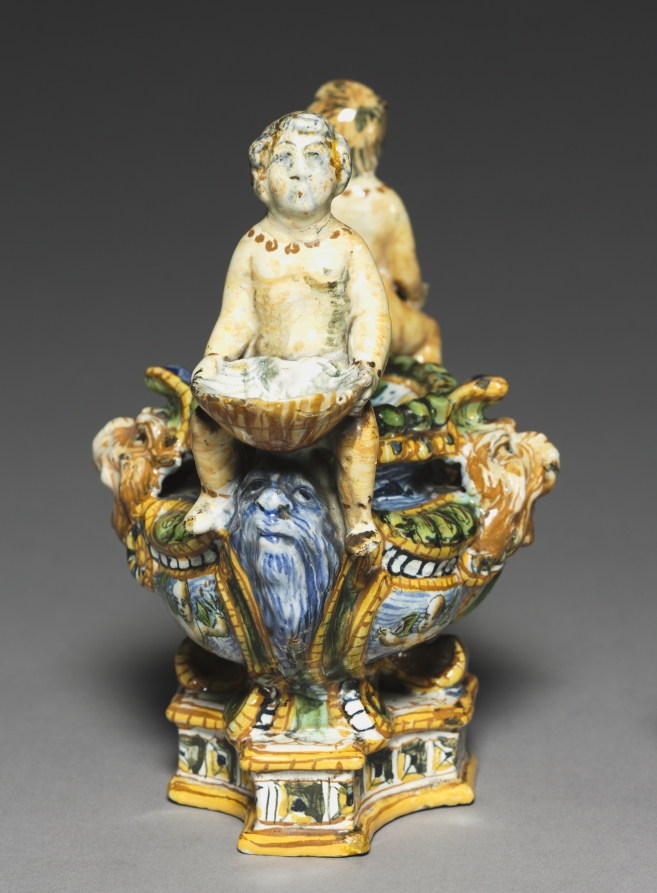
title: Saltcellar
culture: Italy, Urbino, 16th century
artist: circle of the Patanazzi Family (Italian)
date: c. 1570–90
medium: tin-glazed earthenware (maiolica)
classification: Ceramic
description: During the Italian Renaissance of the 1400s and 1500s, nobles and merchants eager to express their wealth and sophistication ordered ceramics for dining, display, and storage. Known as maiolica, because it resembled the brightly colored ceramics from the Mediterranean island of Majorca, these ceramic vessels were covered with a tin glaze that provided an opaque white surface on which colorful decoration could be painted.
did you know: During the Renaissance, salt was an expensive commodity and was used to both season and preserve food.